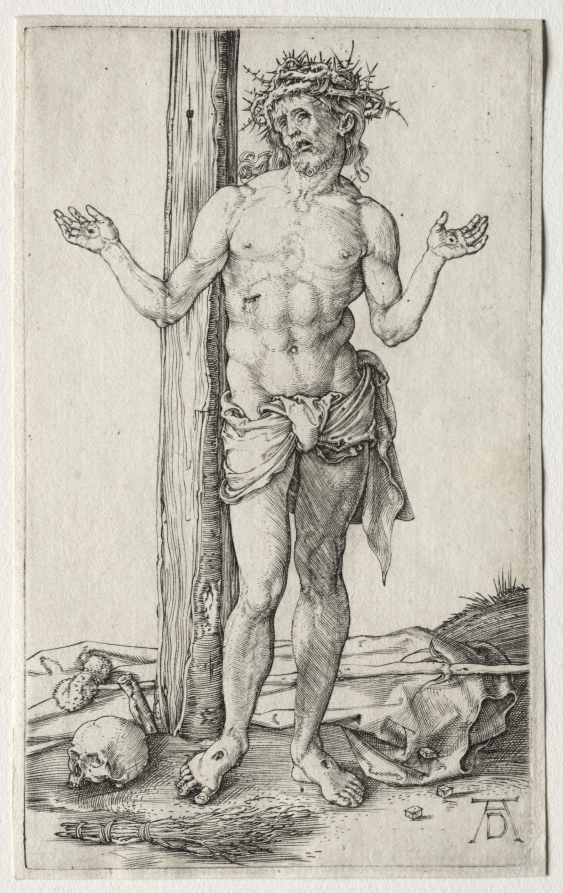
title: The Man of Sorrows Standing, with Hands Raised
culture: Germany, late 15th-early 16th Century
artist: Albrecht Dürer (German, 1471–1528)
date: c. 1500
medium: engraving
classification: Print